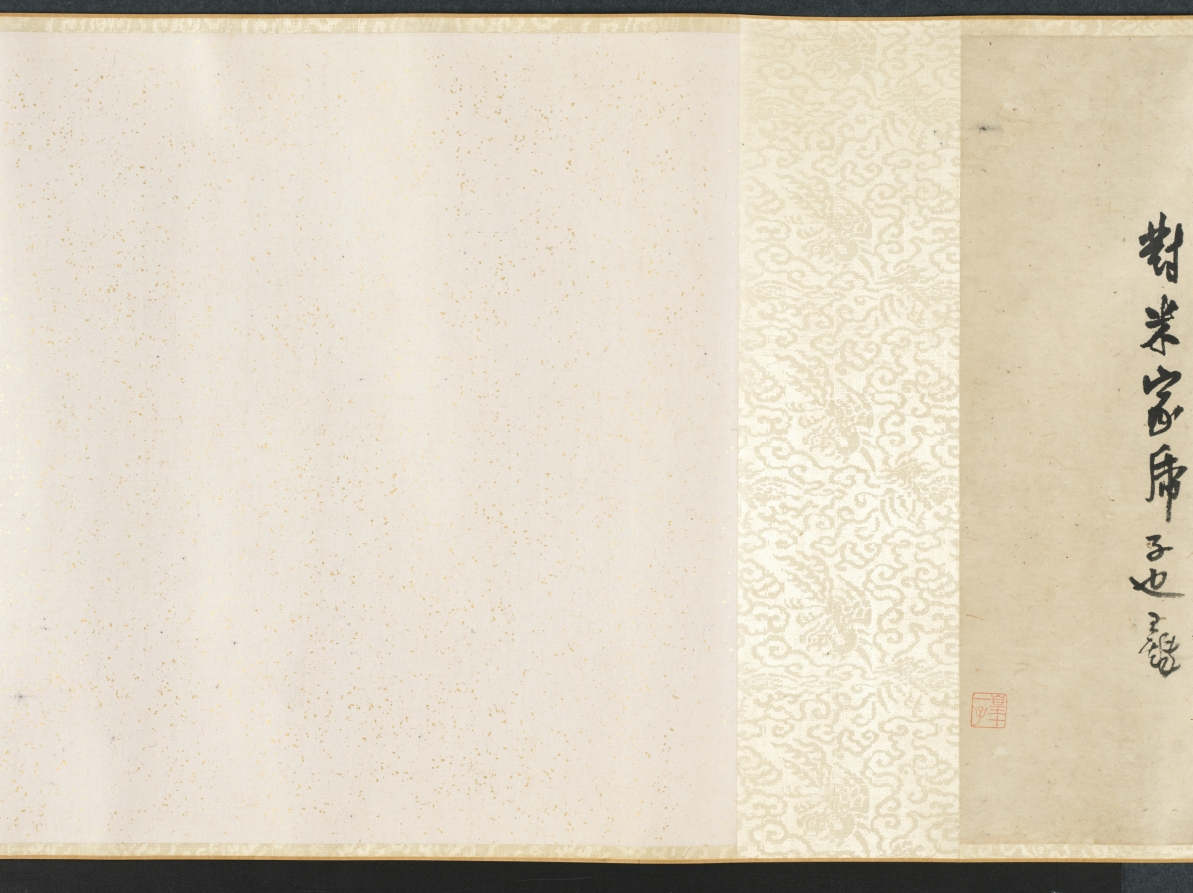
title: Cloudy Mountains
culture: China, Southern Song dynasty (1127-1279)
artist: Mi Youren (Chinese, 1072–1151)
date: 1130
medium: Handscroll; ink and color on silk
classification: Painting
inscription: 好山無數接天涯，烟靄陰晴日夕佳。/ 要識先生會到此，故留筆戲在君家。/ 庚戍歲，辟地新昌作。元暉。/ [seal] 元暉戲作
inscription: [Seal] 安陽孫氏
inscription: [Seal] 畢瀧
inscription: [Seal] 成親王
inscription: [Seal] 永瑆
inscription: [Seal] 錫三 appears twice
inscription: [Seal] 養性齋珍藏書畫印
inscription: [Seal] 芷陔審定真跡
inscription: [Seal] 玉簡齋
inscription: 2 colophons (1 dated 1650), inscription dated 1647, and 2 seals of Wang To (1592–1652)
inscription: 1 colophon, dated second month of the gengyin year 庚寅 (1650), and 2 seals of Chen Kuang 陳爌 (1646 jinshi degree)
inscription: 7 seals unidentified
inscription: A separate scroll containing six colophons on Cloudy Mountains exists; the inscribers are Luo Zhenyu 羅振玉 (1866–1940), Naito Torajiro 內藤虎次郎 (1866–1934), Nagao Ko 長尾甲 (1864–1942), and Wu Changshuo 吳昌碩 (1844–1927). Naito Torajiro alone wrote three colophons.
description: Cloudy Mountains captures the view of a lush and misty riverscape, an impression of Mi Youren’s new environment, painted in a moment of peace. With the fall of the Northern Song dynasty in 1127 upon the Jurchen’s military invasion, Mi Youren fled south across the Yangzi River. In 1130, he had reached Xinchang in Zhejiang province and thanked his host with this painting for having given him shelter. Mi Youren was the oldest son of the art critic Mi Fu (1051– 1107); both developed a distinct style of mountain scenery by accumulating wet ink dots that create a hazy atmosphere.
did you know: This scroll is one of the museum’s earliest dated Chinese paintings.